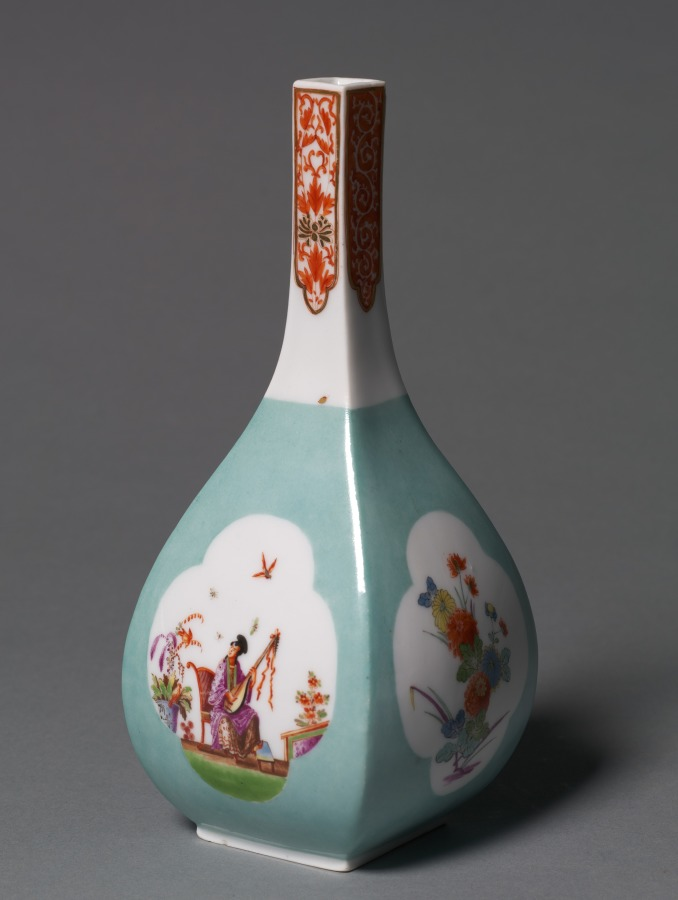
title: Saki Bottle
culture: Germany, Meissen, 18th century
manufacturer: Meissen Porcelain Factory (German, est. c. 1710)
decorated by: probably by Johann Gregor Herold (German, 1696–1775)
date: c. 1730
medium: porcelain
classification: Ceramic